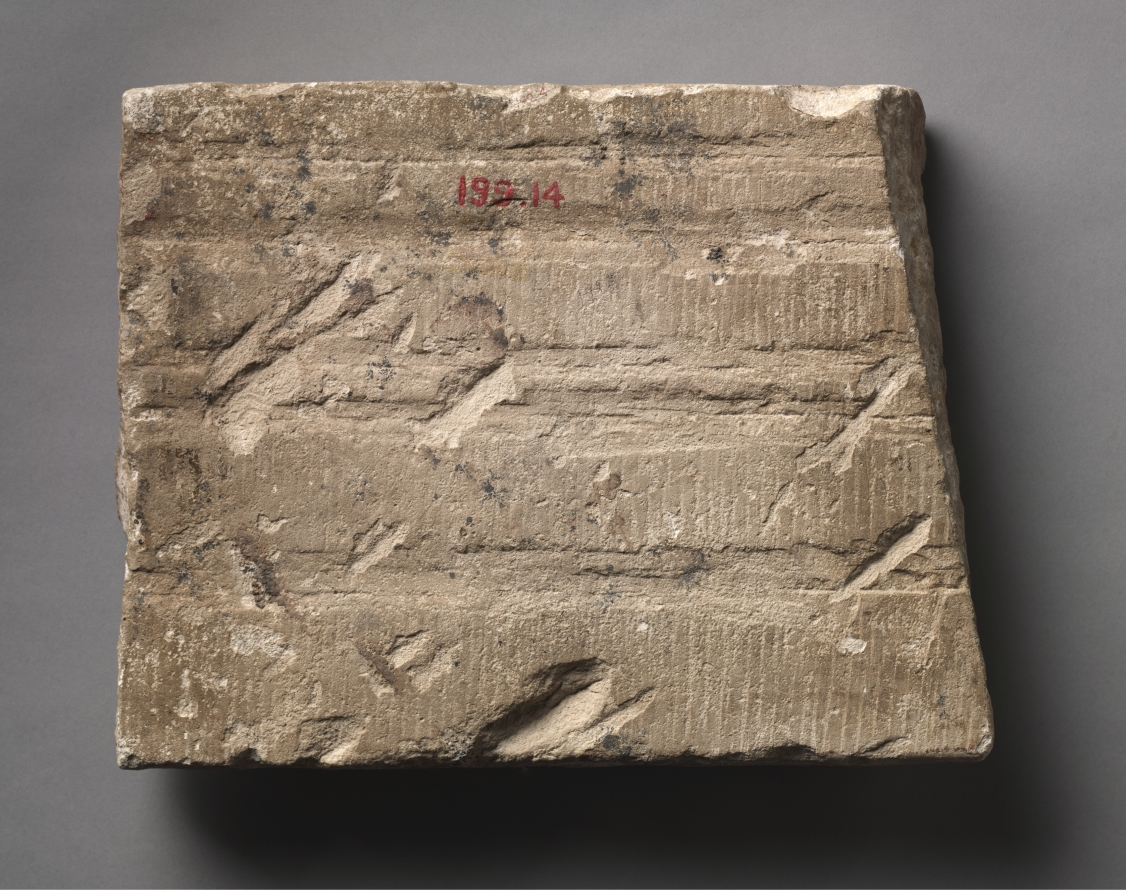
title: Fragment of a Lintel: Hapiu's Female Musicians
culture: Egypt, Late period (715–332 BCE), Dynasty 30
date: 380–343 BCE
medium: limestone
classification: Sculpture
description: This fragment of relief formed part of a lintel over the door of a small niche or shrine in the tomb of a man called Hapiu. Two female musicians are shown on either side of a large stand bearing a floral arrangement. The first woman, wearing a long coat, beats a drum; the second, scantily clad, plucks a lyre, dancing as she plays.